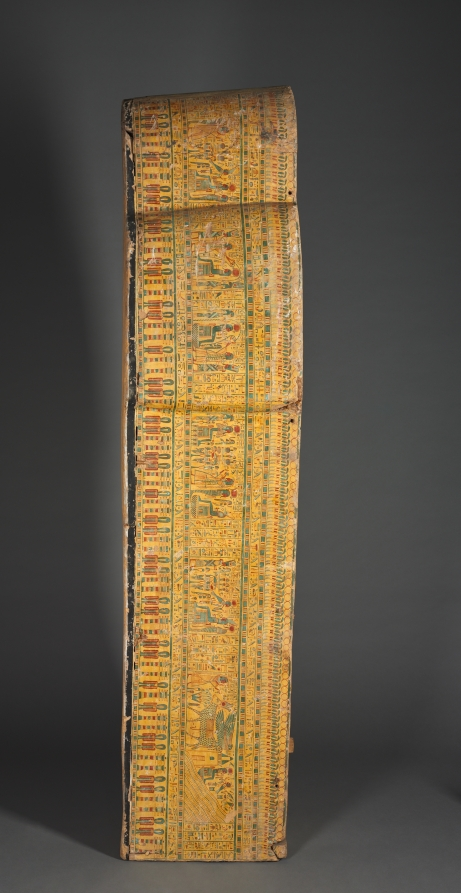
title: Coffin of Bakenmut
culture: Egypt, Thebes, Third Intermediate (1069–715 BCE), Dynasties 21–22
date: c. 1000–900 BCE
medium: gessoed and painted sycamore fig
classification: Funerary Equipment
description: The coffin of Bakenmut is one of the finest examples of painted wooden coffins made for the priests of Amen and their families at Thebes during Dynasty 21 and early Dynasty 22. The pharaohs of this time were no longer buried in the Valley of the Kings, but instead built tombs in the Delta, far to the north, where they resided. Security was lax in the Theban necropolis. The coffins and funerary goods of the wealthy citizens of Thebes were placed in unmarked and undecorated family tombs cut into the cliffs on the west bank of the Nile. All the care and detail that in more prosperous times were devoted to the decoration of the tomb chapel were now lavished on the elaborately painted coffins. Every available surface is crowded with religious scenes, images of funerary gods and goddesses, protective spells, and magical symbols. The deceased appears mummiform. An elaborate floral collar entirely covers the upper body, exposing only the separately attached hands (now lost). A pair of red "mummy braces" are crossed over the chest, their point of intersection marked by a winged sun disk. The lower body is covered with tiny figures modeled in gesso against a yellow background, which gives the effect of gold inlaid with glass or semiprecious stone. The decoration on the interior features two deified dead kings of Dynasty 18. Although these rulers had lived centuries before, memory of their greatness was still very much alive. The main scene near the top depicts Tuthmosis III, the great military pharaoh, who lived 500 years before Bakenmut. Posed as a mummy, the ruler wears a brilliant feathered garment enfolding him with falcon’s wings. The scene below features back-to-back seated images of Amenhotep I, regarded as the patron of the Theban cemetery and worshiped as a local god there.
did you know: Originally another smaller coffin was placed inside this outer coffin and in that the deceased with a mummy board would have rested.